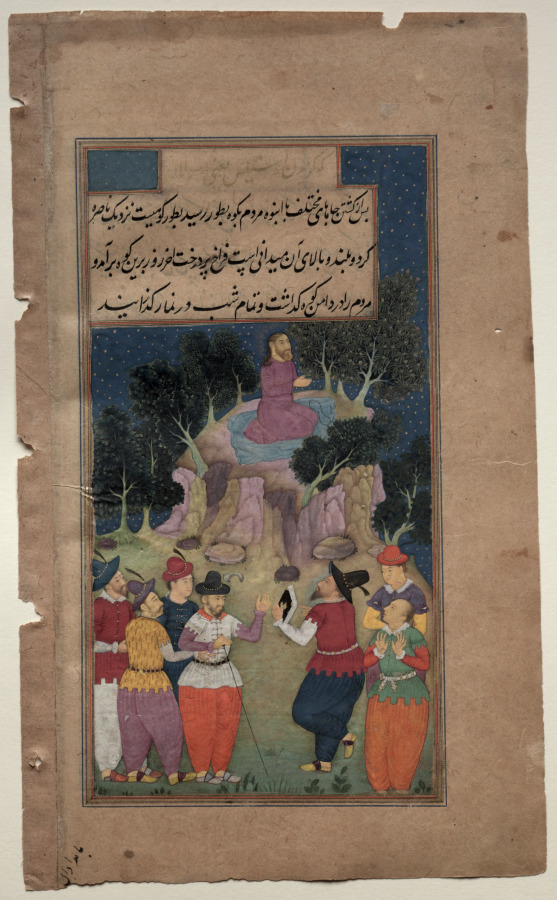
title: Jesus on Mount Tabor, near Nazareth where he Chooses Twelve of his Followers and Calls them Apostles (folio 87 verso), from a Mirror of Holiness (Mir’at al-quds) of Father Jerome Xavier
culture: Mughal India, Allahabad, made for Prince Salim (1569–1627)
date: 1602–04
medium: Gum tempera, ink, color, and gold on paper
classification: Manuscript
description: When Jesus arrived at Mount Tabor, he left his followers at the foot of the hill and spent the entire night in prayer. This is the only night scene in the manuscript, and the artist has used glowing colors and gold paint to dot the night sky with stars. Seven of the 12 apostles mill around the foreground; some converse with animated gestures, possibly debating the contents of a text. At dawn Jesus will have summoned the 12, named them his apostles and given them the power to drive out unclean spirits and heal the sick and infirm.